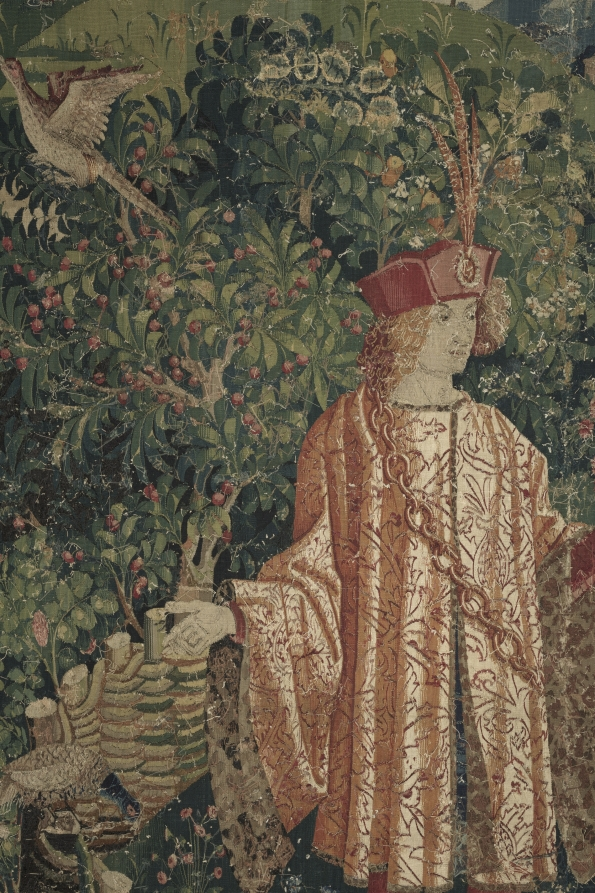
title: Time (from Chateau de Chaumont set)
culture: France, Lyon(?), early 16th century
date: 1512–15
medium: silk and wool; tapestry weave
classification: Tapestry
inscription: French verse in Gothic letters translates as follows: "One sees the weather adorned in green, Sometimes as pleasing as an angel; To suddenly change and be quite strange, The weather never stays the same."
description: Pierre Sala, who likely commissioned the set, is portrayed as the richly attired central figure offering a bouquet, a symbol of knowledge, to Éléonore, his daughter. Éléonore is pregnant, revealed by her upturned skirt and the persimmon in her husband Hector’s hand. Hector’s mother, Marguerite, in dark attire, will wed the widowed Sala in 1519. They appear in front of the royal chateau of Blois. The figures at the right convey Sala’s advice to his children. Time (the old man with the staff) with Clio, the Muse of History, standing on his shoulders, is being attacked by a Herculean youth wielding a stick. With this allegory, Sala is explaining that youth is ignorant of the complexities of life and time. The small unicorn at the far right represents the soul. The verse in Old French at the top refers to changing time: One sees Time adorned with green foliage, Sometimes as pleasant as an angel, Then suddenly change and become quite strange. Never does Time persist in one state.